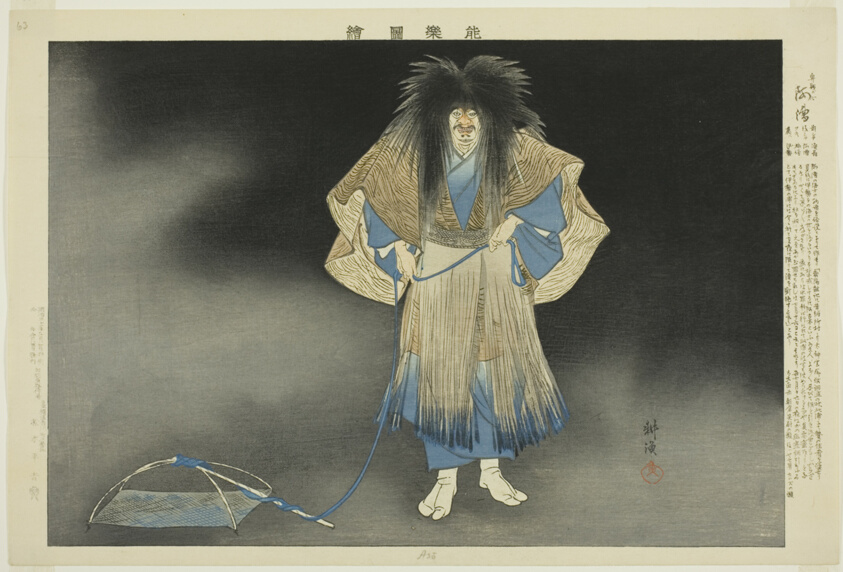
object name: Print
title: Akogi, from the series "Pictures of No Performances (Nogaku Zue)"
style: Japanese (culture or style)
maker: Tsukioka Kogyo; Japanese, 1869-1927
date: 1898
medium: Color woodblock print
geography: Japan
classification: woodblock print; print; asian art